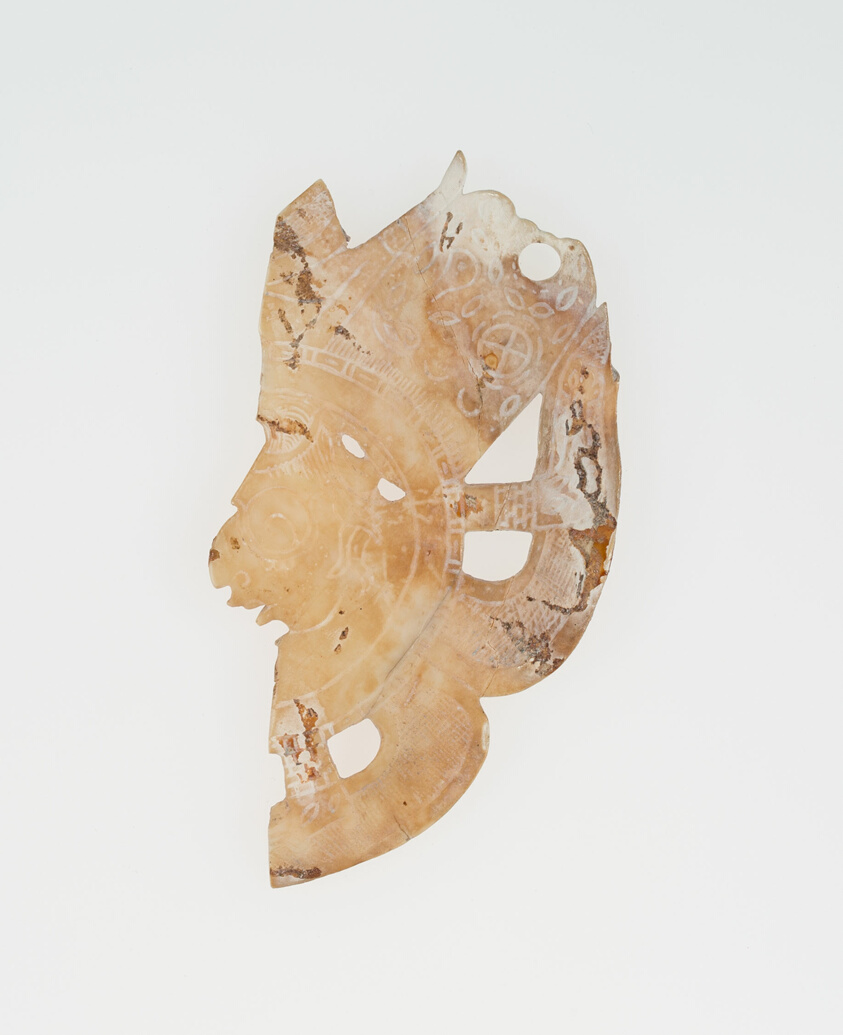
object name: Costume and Accessories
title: Carved Shell Depicting the Profile Face of Diety (Broken)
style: maya, classic, mesoamerican, Pre-Columbian, americas, mayan, Arts of the Americas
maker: Maya (Mexico or Guatmala)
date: 250–900 CE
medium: Shell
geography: Mexico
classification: shell; decorative object/ornament; art of the americas; costume